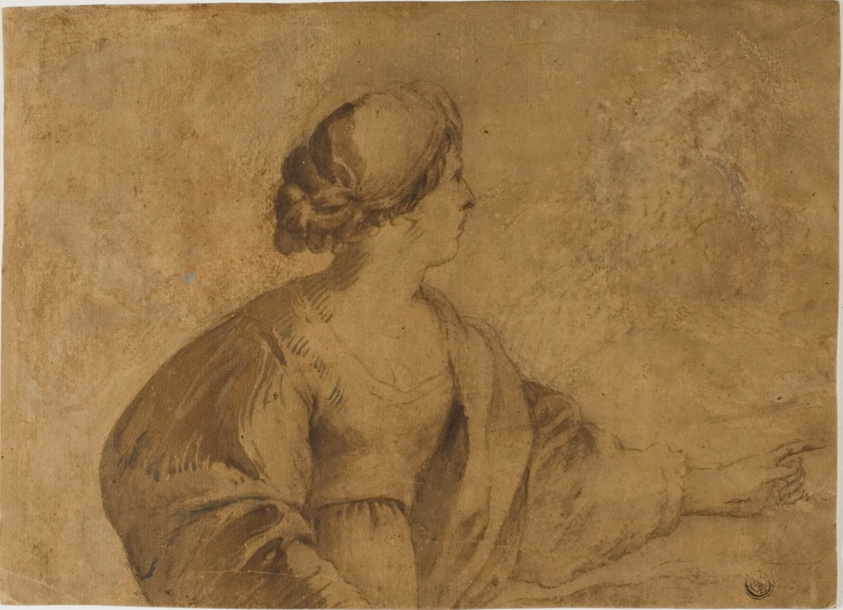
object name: Drawing and Watercolor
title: Woman in Profile, Pointing with Left Hand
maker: After Guercino; Italian, 1591-1666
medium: Pen and brown ink, with brush and brown wash, heightened with lead white (discolored), on dark tan laid paper, laid down on cream laid paper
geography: Italy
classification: ink or chalk wash; drawings (visual works); prints and drawing